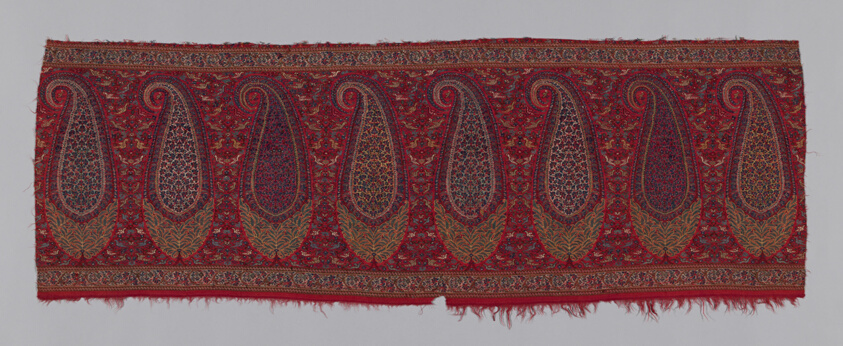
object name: Costume and Accessories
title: Pallu (Shawl Border) Fragment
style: 19th century, kashmiri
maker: Kashmir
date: c. 1820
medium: Wool, double interlocking 2:2 'S' twill tapestry weave; main warp fringe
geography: Kashmir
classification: textile; weaving; costume; costume accessory; garment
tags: paisley, floral motifs, floral